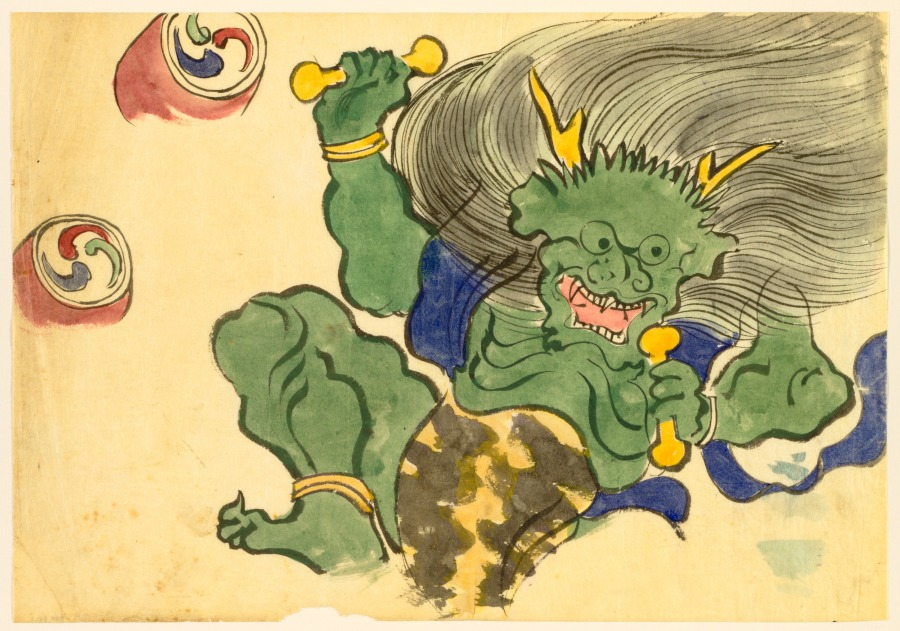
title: Flowers of a Hundred Worlds (Momoyogusa): God of Thunder (Raijin)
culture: Japan, Meiji period (1868–1912)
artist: Kamisaka Sekka (Japanese, 1866–1942)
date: 1909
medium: ink and color on paper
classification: Drawing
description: Kamisaka Sekka made preparatory drawings for his Flowers of a Hundred Worlds series on tracing paper with ink and color. The freehand sketches are much looser than the finished, printed compositions.